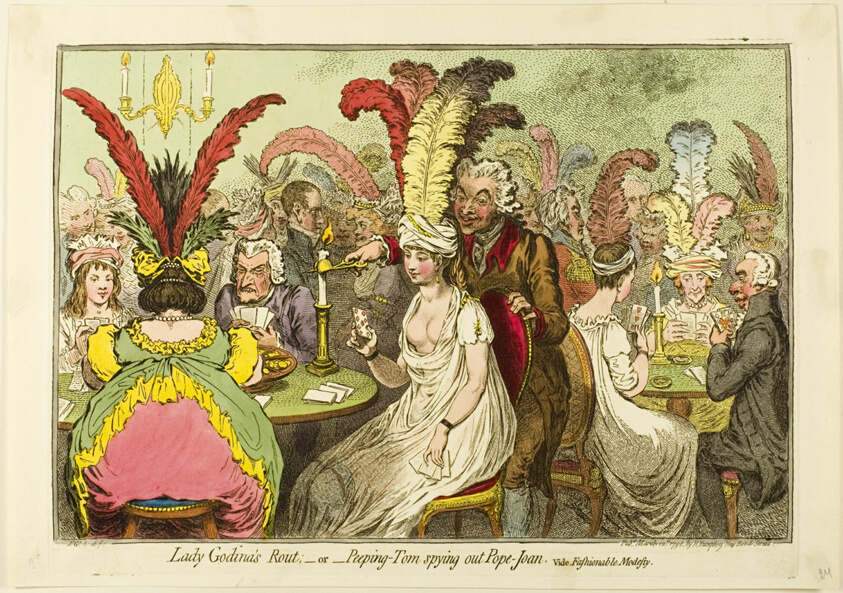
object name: Print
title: Lady Godina's Rout; —or—Peeping Tom Spying Out Pope Joan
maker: James Gillray (English, 1756-1815); published by Hannah Humphrey (English, c. 1745-1818)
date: published March 12, 1796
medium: Etching in dark brown, with handcoloring, on cream wove paper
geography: England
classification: etching; print; prints and drawing